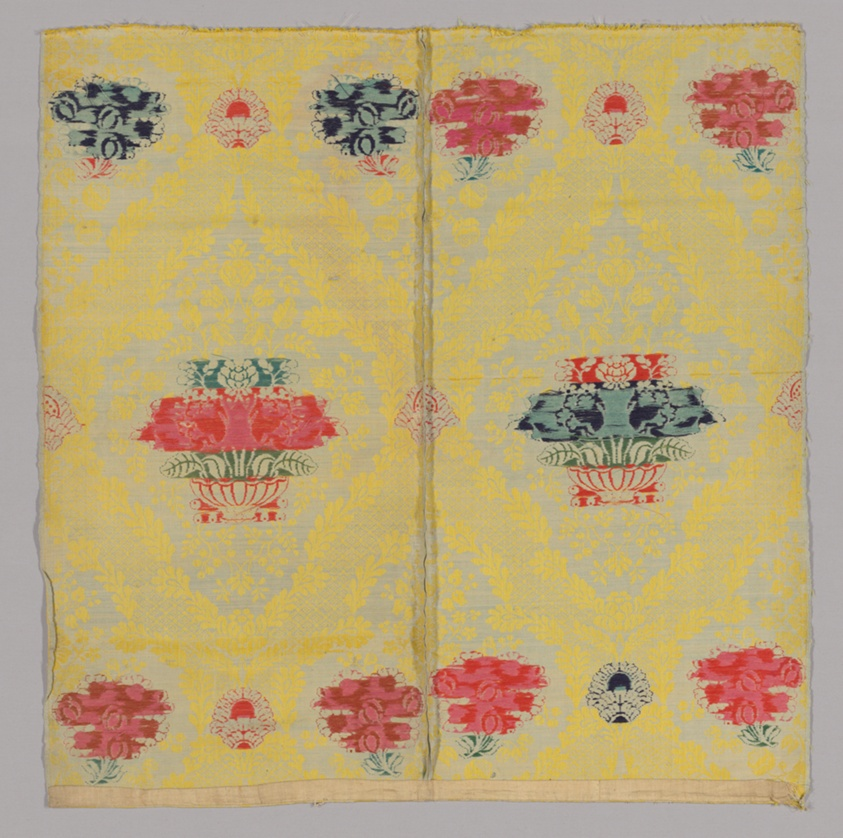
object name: Textile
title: Two Joined Panels of Brocaded Yellow Furnishing Wool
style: 18th Century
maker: England, Probably Norwich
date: c. 1720s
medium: Wool, worsted, damask weave; brocaded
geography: England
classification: weaving; textile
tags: flowers, foliage, fruit, baskets